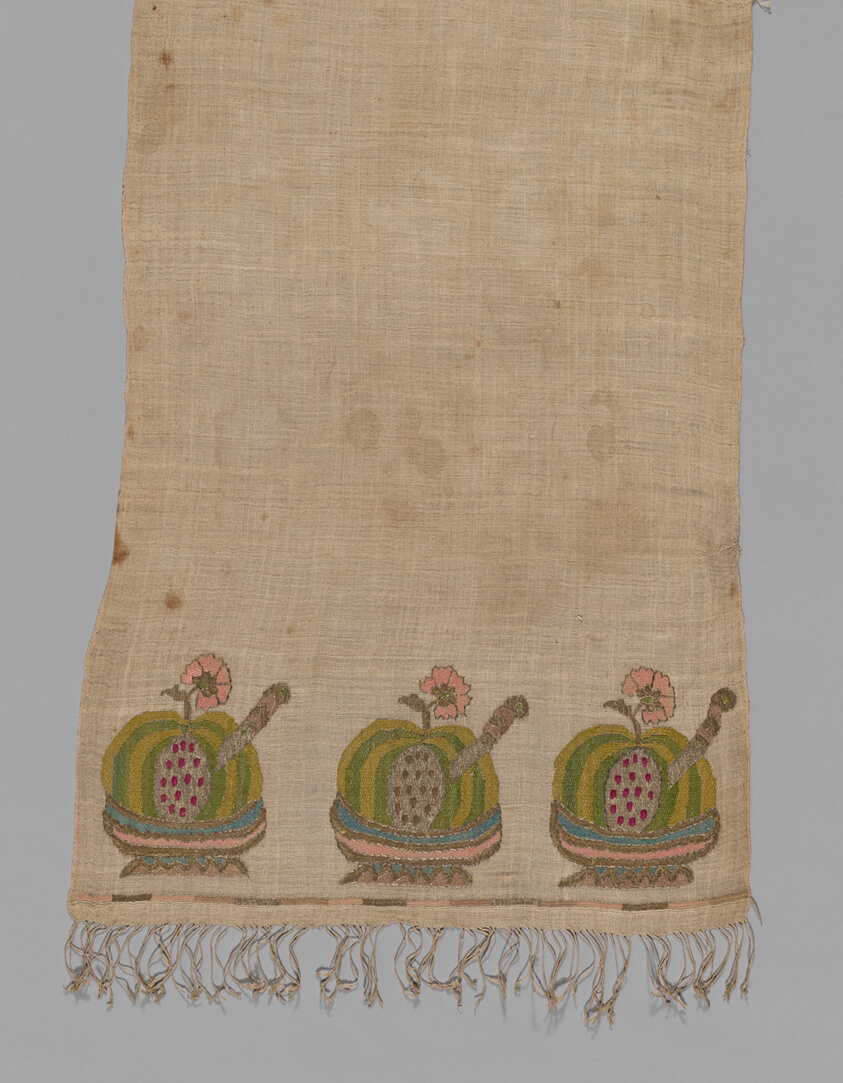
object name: Textile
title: Towel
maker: Turkey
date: 19th century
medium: embroidered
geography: Turkey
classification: textile; needlework (visual works); weaving